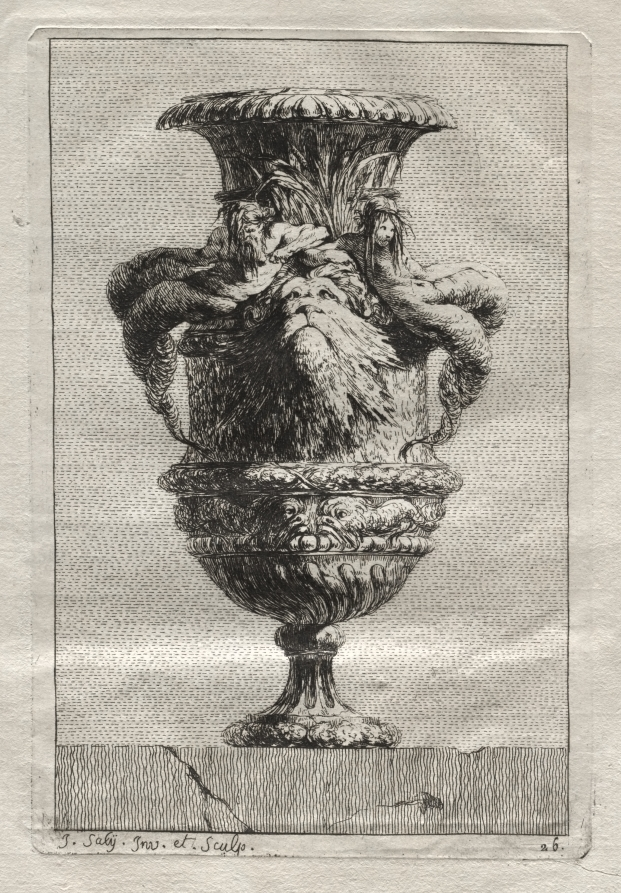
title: Suite of Vases: Plate 26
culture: France, 18th century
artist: Jacques François Saly (French, 1717–1776)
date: 1746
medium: etching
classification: Print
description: Designing ornamental vases or urns was particularly popular during the mid-18th century since the only limit to the possibilities was the imagination of the artist. Saly, a sculptor by training, was a student at the French Academy in Rome from 1740 to 1746, at which time he published a set of 30 etchings. Saly began with basic antique vase forms but deviated from classical ornament to use a rich variety of fantastic creatures for embellishment.